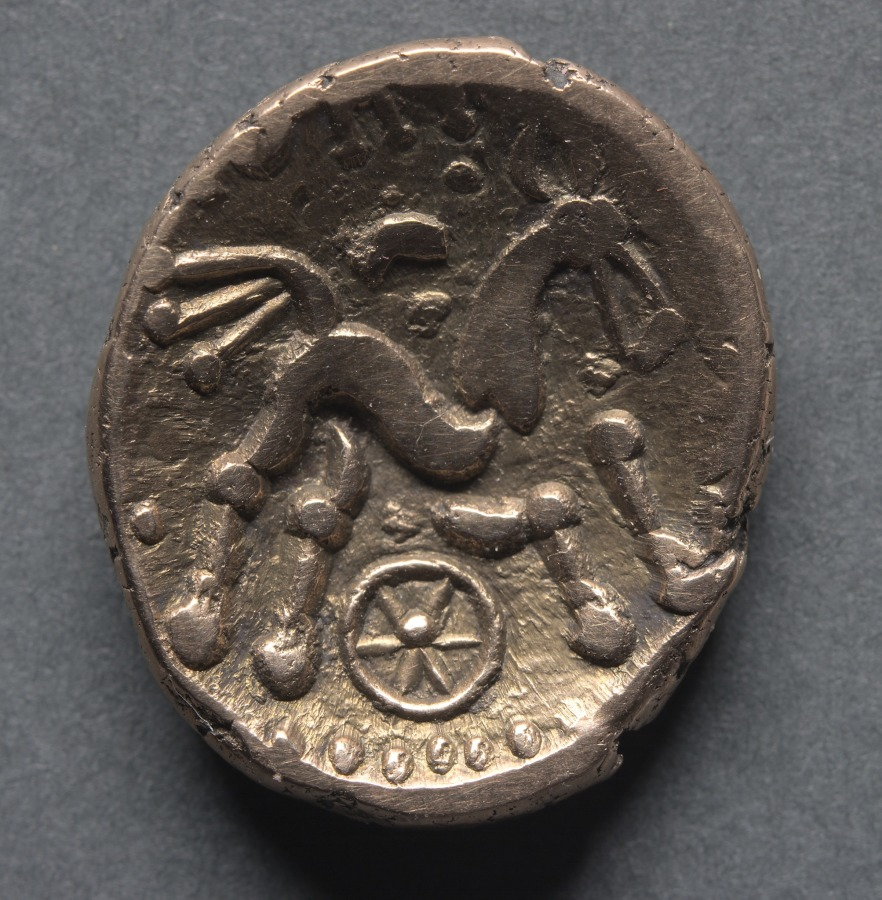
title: Catti Stater: Tree Symbol on Plain Field (obverse); Horse and Wheel (reverse)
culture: England, Dobunni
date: 20–45 CE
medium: gold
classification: Coins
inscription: CATTI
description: This piece comes from Dobunni territory, the tribe occupying an area in the Cotswold (Severn estuary) country. The names found on them are probably those of chieftains rather than of kings. Names such as Catti, Antedrig, Inam, and Comux appear on various pieces, all names unknown in history. The horse has now become crude on his journey to the wilder parts of the country, but the wheel of the lost chariot remains.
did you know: The Dobunni were one of the tribes believed to have issued coins before the Romans' arrival.